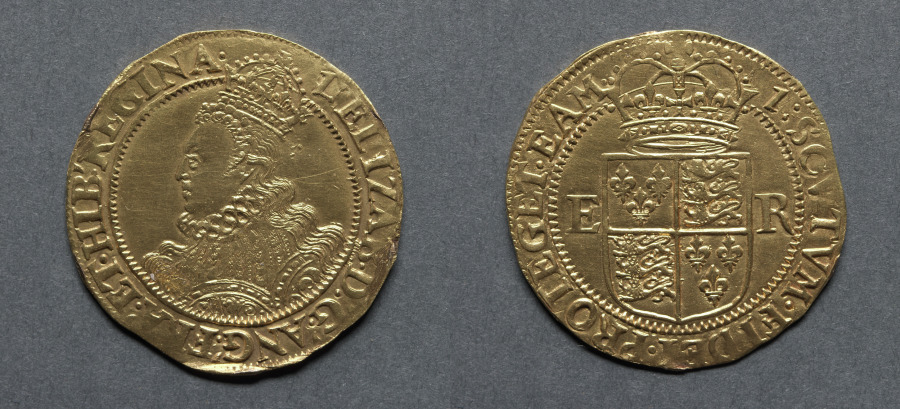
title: Half Pound: Elizabeth I (obverse); Crowned Shield of Arms (reverse)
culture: England, Elizabeth I, 1558-1603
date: 1601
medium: gold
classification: Coins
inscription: ELIZAB' D'.G'. ANG'. FRA'. ET: HIB. REGINA.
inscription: SCVTVM: FIDEI: PROTEGET: EAM.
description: The design of this rare piece is similar to another in the collection of Elizabeth I, 1969.184. However, the initial marks denote it was struck in 1601. Elizabeth I is shown finely dressed and around her is her abbreviated title, Elizabeth by the Grace of God, Queen of England, France and Ireland. On the reverse is the shield of arms of England showing lions and the fleur-de-lis. Although Elizabeth was officially titled Queen of France, the title was a hollow one. Calais, England's last French territory, was lost in the reign of Mary I. This version of the coat of arms lasted until James I who added the arms of Scotland and Ireland.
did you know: Elizabeth I was the last of the five monarchs from the House of Tudor.